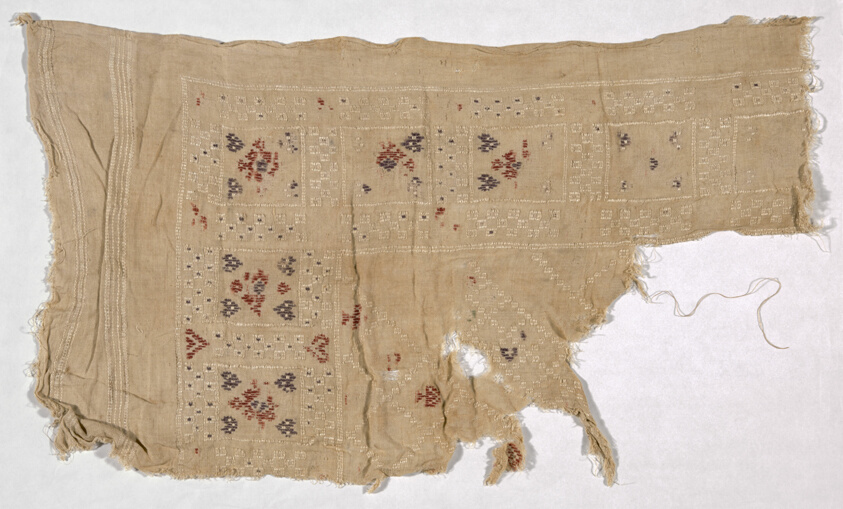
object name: Textile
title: Fragment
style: roman period (egyptian), coptic (period)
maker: Egypt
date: Roman period (30 B.C.– 641 A.D.)/Arab period (641–969)/Fatimid period (969–1171), 3rd/ 10th century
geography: Egypt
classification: textile; weaving